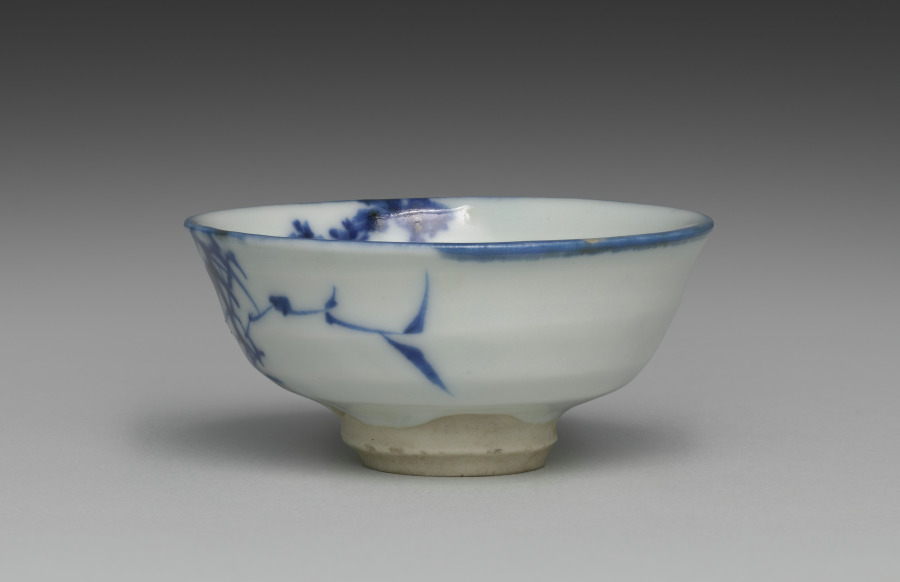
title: Sake Cup with Auspicious Plants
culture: Japan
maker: Seifū Yohei II (Japanese, 1844–1878)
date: 1861–78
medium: One of a pair of sake cups; porcelain with underglaze blue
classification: Ceramic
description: Seifū Yohei II excelled as a painter, as evidenced by his floral and landscape designs. His works were selected as the best among Kyoto ceramics shown to jurists from Europe and the US, thus paving the way for international recognition of the studio in the late 1800s.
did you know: Orchid, bamboo, chrysanthemum, and plum all appear on this cup and have associations with the four seasons.